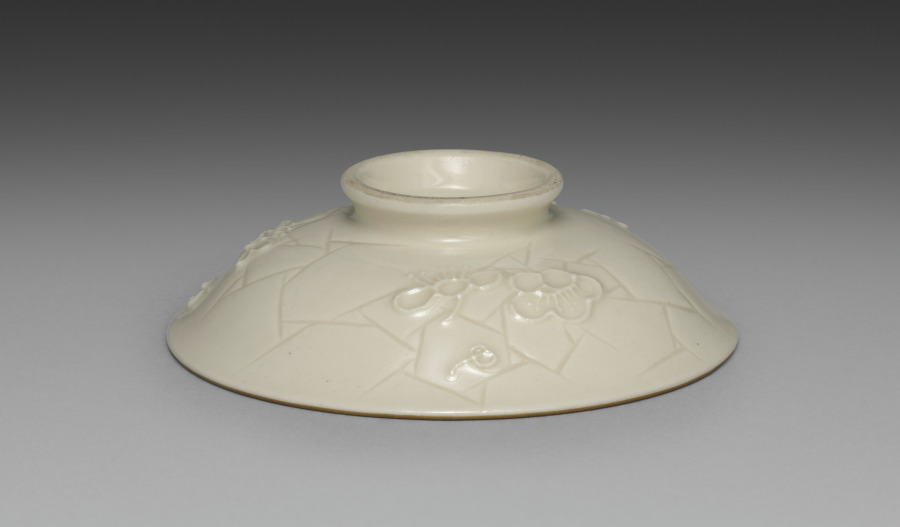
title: Cover for a Bowl from Dining Set with Plum Blossoms and Cracked-Ice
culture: Japan, Meiji period (1868–1912)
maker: Seifū Yohei II (Japanese, 1844–1878)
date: c. 1875–78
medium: Porcelain with molded designs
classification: Ceramic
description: Each item in this set has a delicate low-relief design of flowering plum branches over scattered, intersecting lines meant to resemble the cracked-ice surface of a frozen body of water and is signed on the base in gold pigment. While Yohei II produced many fine works in underglaze blue, like those produced by Kiyomizu Shichibei, he also made works in quite different styles later in his career, from the early 1870 s. In 1873, he was appointed purveyor to the Industrial Center of Kyoto Prefecture, a designation associated with Kyoto’s efforts to reach an international market through the port of Kobe; and from 1875 until his death, he was involved in national-level projects to present Japanese ceramics across the world. It was during this period that Yohei III was apprenticed to Yohei II, and it has been suggested that this set may in fact be an early example of Yohei III’s work, which he signed with his teacher’s name. Decorated with flowers resembling Japanese textile motifs, the set calls to mind the design of Yohei II’s pair of vases with plum blossoms in the Victoria and Albert Museum. Here, the elaborate trees created for a formal public exhibition setting have been translated into the approachable blossoms of the genteel domestic environment. While the designs are consistent across the pieces, each raised flower petal and pistil and each incised line in the ice was done by hand, so the cups, bowls, and dishes are similar yet unique. The bottoms of two boxes once identified the set’s owner, but the information has been deliberately obscured with black ink. However, inscriptions still visible appear to indicate two occasions, once at the end of July 1886 , and once again in June 1916 , when parts of the set were requested from Hokura in Niigata Prefecture. The location corresponds to a neighborhood in the present-day city of Jōetsu. The surname Tsuji 辻 also appears on a paper tag affixed to one of the box cloths. Future research may possibly reveal more about their provenance. A vase by Yohei III in a private collection combines the formal grandeur of the Yohei II vases in the Victoria and Albert Museum with the gentler design of this dining set, placing flowering plum trees against soft, scalloped-edge clouds resembling those in golden screens.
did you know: The dining wares have a creamy white coloration that the four boxes containing them identify as Korean in style.